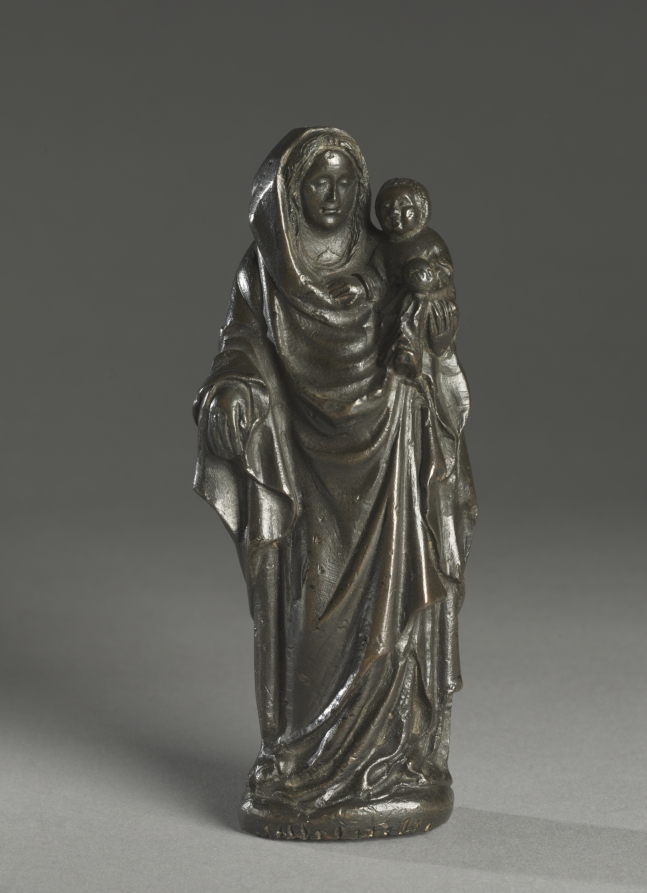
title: Virgin and Child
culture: South Netherlands, Brabant, late 14th-early 15th century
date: c. 1400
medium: bronze or brass (solid cast)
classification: Sculpture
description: The rectangular cast hole in the middle of the back, intended to receive a supporting bar, indicates a probable origin on a brass font or lectern.